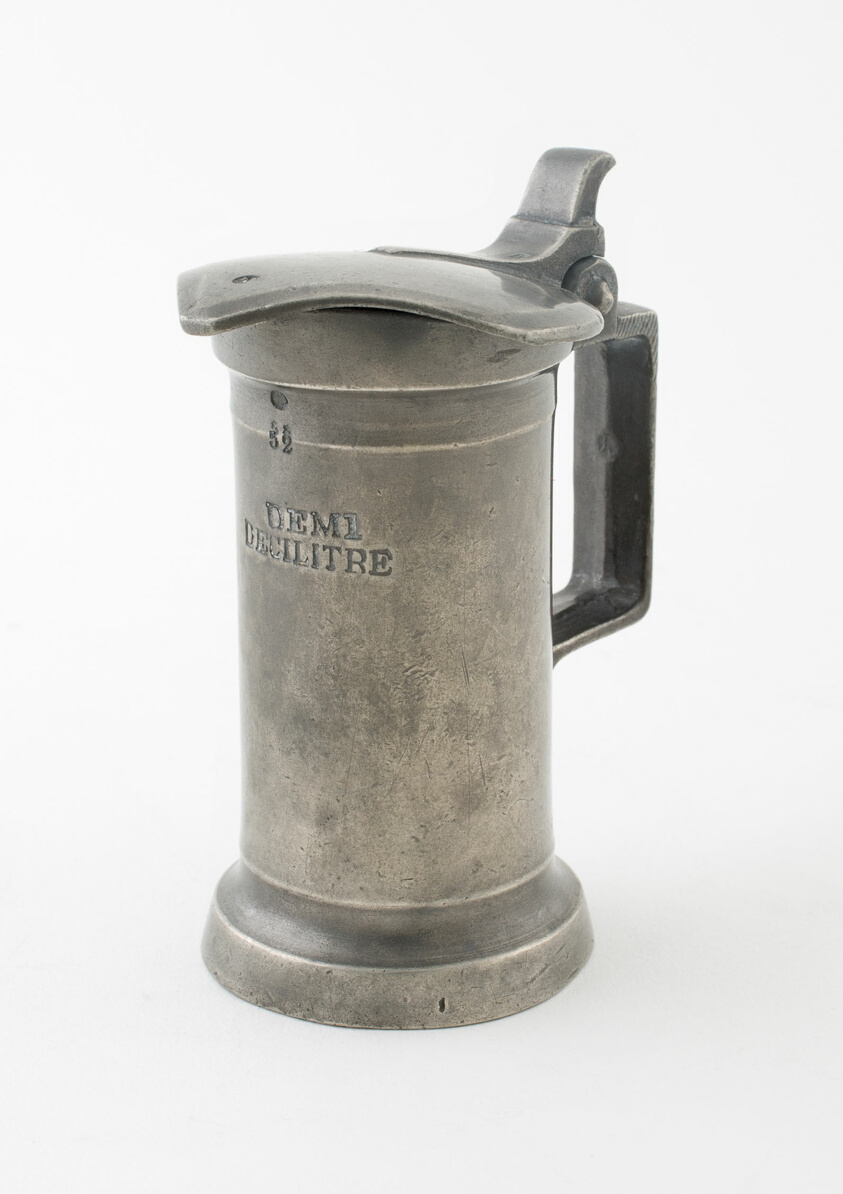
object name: Metalwork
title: Measure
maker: Maison Le Seigneur; Deverre; Caen, France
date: 1875/1895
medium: Pewter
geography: Caen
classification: pewter; metalwork; european decorative arts